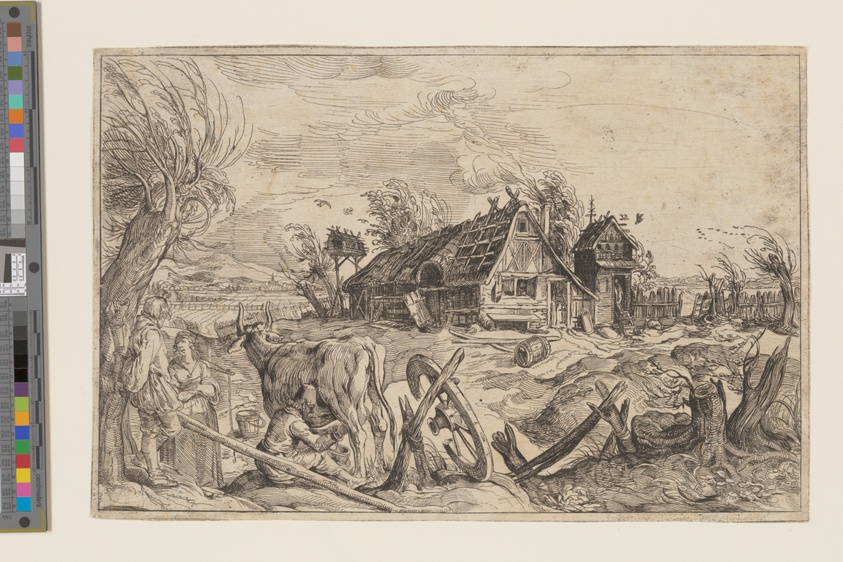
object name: Print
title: Landscape with a Farmhouse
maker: After Jacques de Gheyn II; Dutch, 1565–1629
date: possibly 18th century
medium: Etching on ivory laid paper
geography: Netherlands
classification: print; paper; etching; prints and drawing